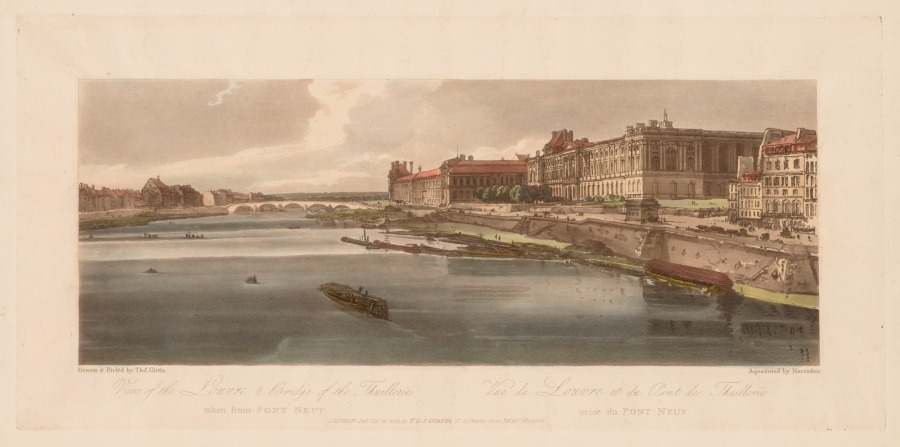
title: A Selection of Twenty of the Most Picturesque Views in Paris: View of the Louvre & Bridge of the Thuilleries taken from Pont Neuf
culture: England, 19th century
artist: Thomas Girtin (British, 1775–1802)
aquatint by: J.B. Harraden (British)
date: 1802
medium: softground etching and aquatint printed in brown, hand-colored with watercolor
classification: Print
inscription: In plate: Drawn & Etch'd by Thos Girtin; Aquatinted by J. B. Harraden; LONDON: Pubd Decr 16, 1802 by John Girtin, No. I, Little Newport Street, Gerrard Street, Soho